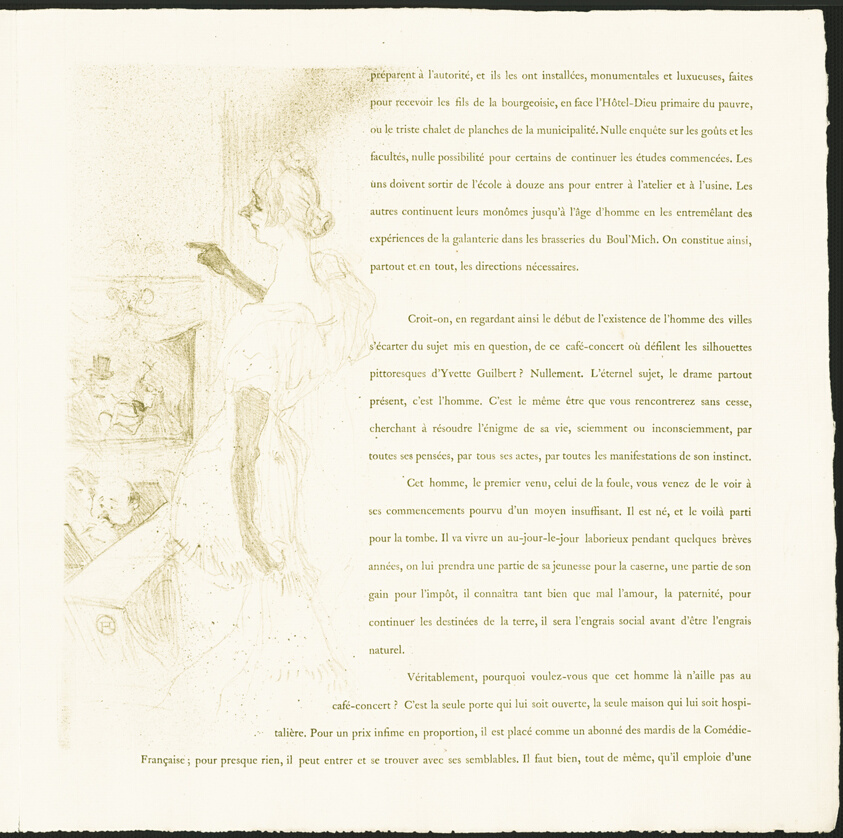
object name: Print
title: Yvette Guilbert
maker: Henri de Toulouse-Lautrec (French, 1864-1901)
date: 1894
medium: Lithograph with letterpress, on ivory laid paper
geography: France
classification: lithograph; print; prints and drawing